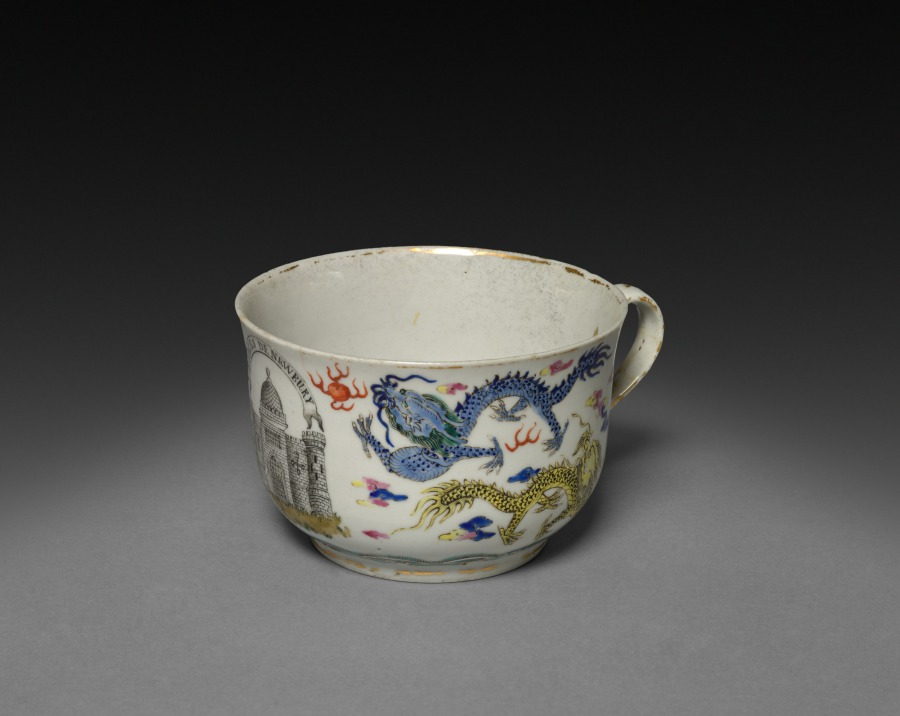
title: Cup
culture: China, Chinese Export, 18th century, Period of Kien Lung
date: c. 1750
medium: porcelain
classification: Ceramic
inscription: in a curved band above the castle: "Burgus De Newbury."